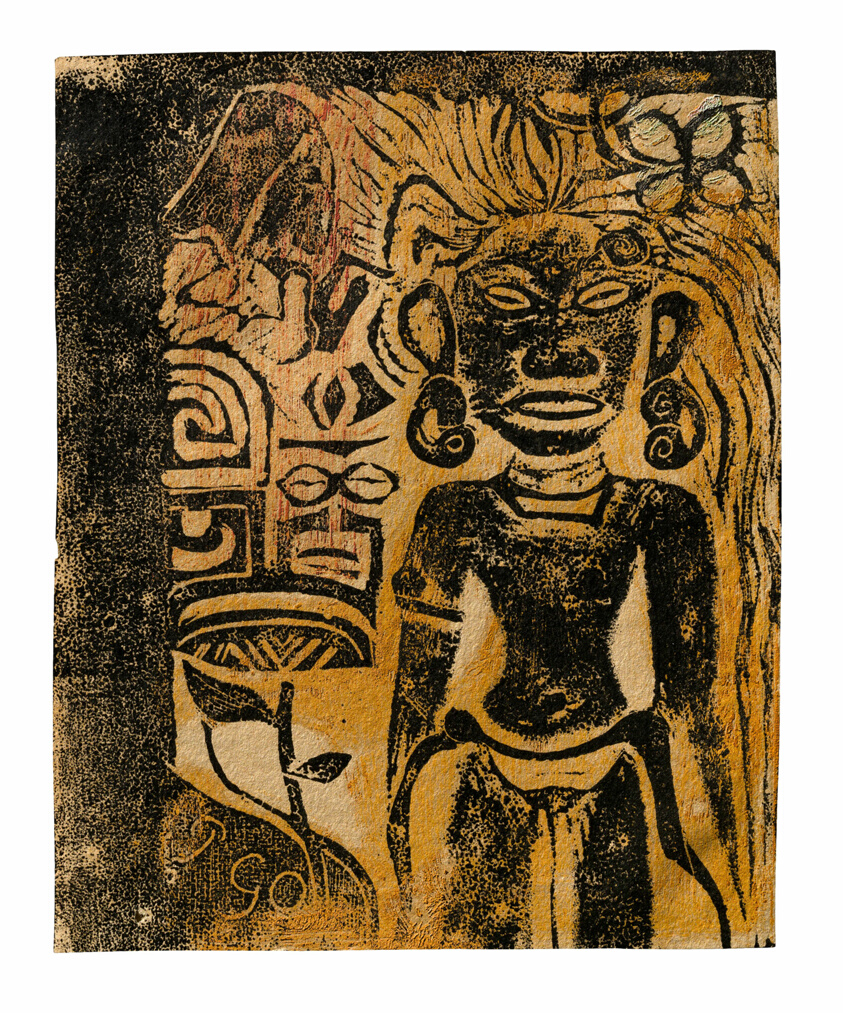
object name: Print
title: Tahitian Idol—the Goddess Hina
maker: Paul Gauguin (French, 1848-1903)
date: 1894/95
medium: Wood-block print in black ink, over brush and solvent thinned and selectively applied yellow ocher, reddish-orange and touches of green and pink wax-and resin-based media, on cream wove paper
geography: France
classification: woodcut; print; prints and drawing